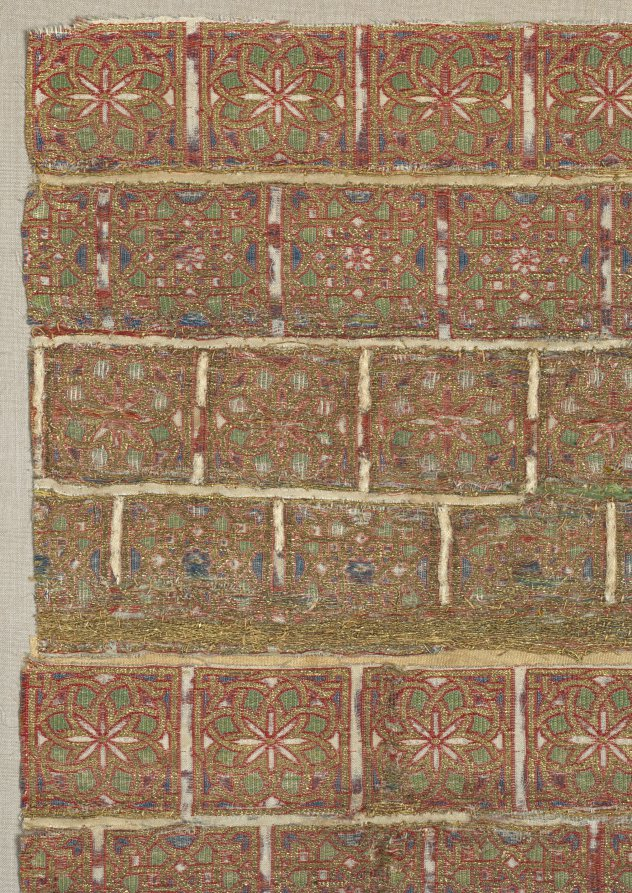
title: Vestment fragment with stars in staggered squares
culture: Spain, probably Almeria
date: 1200s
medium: Silk and gold thread: lampas weave with areas of double cloth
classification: Textile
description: Alternating rows of two different forms of interlacing stars set within square frames convey a jewel-like brilliance with gold and contrasting colors. This fragment was reused in an ecclesiastical vestment that made its way to the cathedral at Lleida in Catalonia, in northeastern Spain. A document dated 1275 records that the Bishop of Lleida and his companions brought “[A] complete set of vestments, of Muslim manufacture, which ornaments they dedicated to San Valero.”